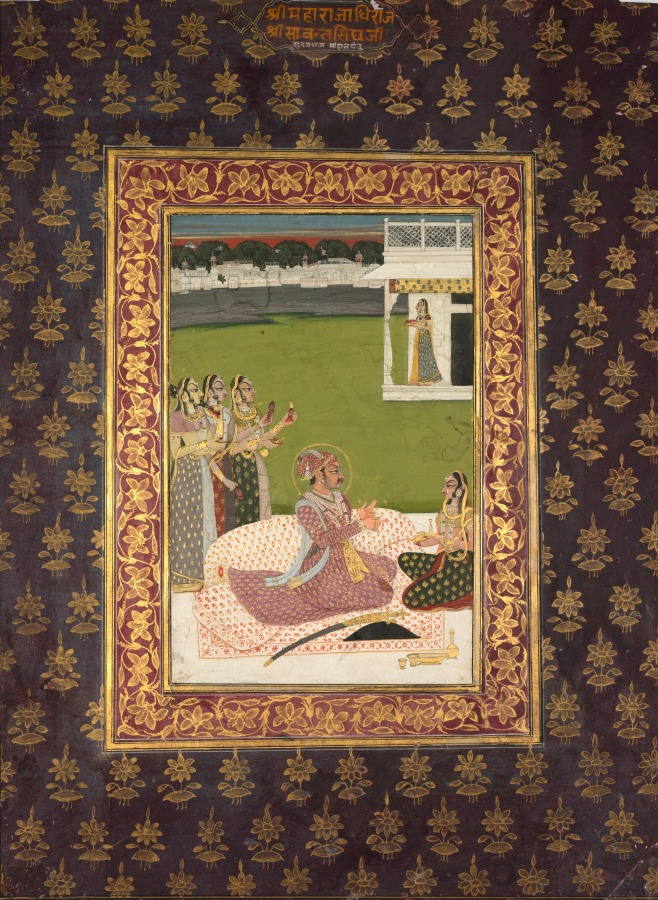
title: Portrait of Maharaja Savant Singh with Consort, Bani Thani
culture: India, Rajasthan, Kishangarh school, possibly Savant Singh reign (1748-1757)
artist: attributed to Nihal Chand (Indian)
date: mid-1700s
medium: Gum tempera, ink, and gold on paper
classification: Painting